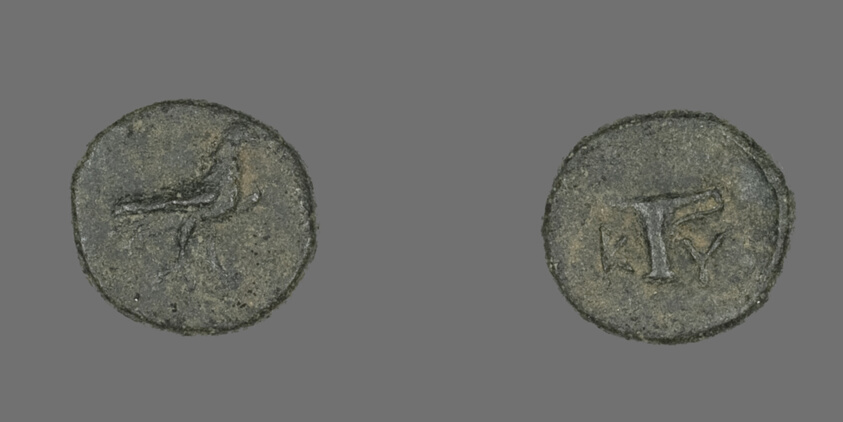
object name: Coin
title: Coin Depicting an Eagle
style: greek, ancient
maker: Greek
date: about 320-250 BCE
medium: Bronze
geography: Ancient Greece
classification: coin; ancient art